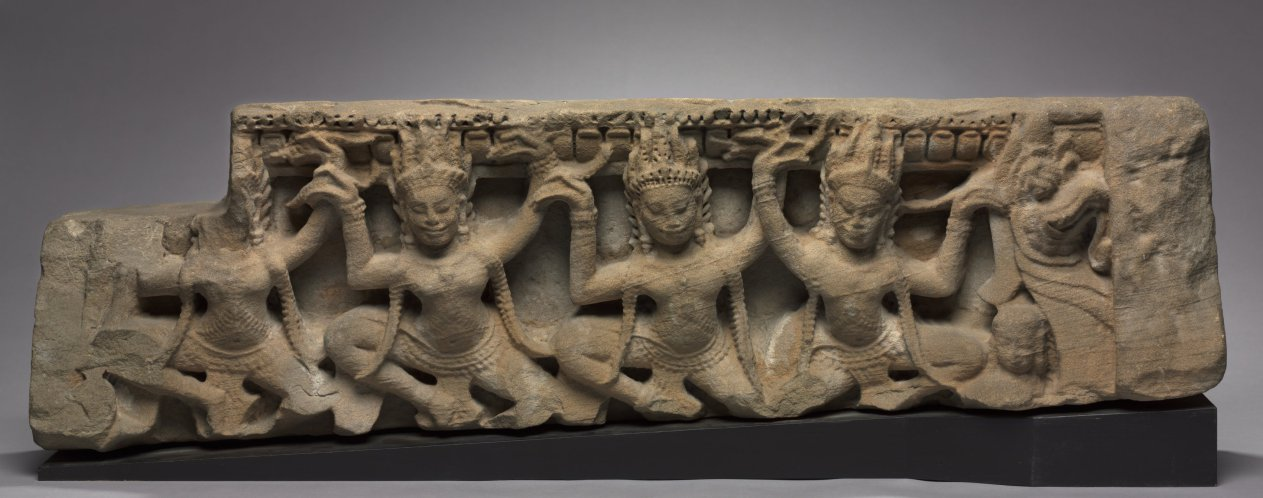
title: Frieze with Apsaras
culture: Cambodia, Angkor, the Bayon, Reign of Jayavarman VII, late 12th-early 13th Century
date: late 1100s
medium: sandstone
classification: Sculpture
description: Celestial dancers, with their legs drawn up to indicate that they are flying in space, enliven this architectural panel from the Bayon, the main state temple of the Khmer empire. The Bayon was conceived like a pantheon, housing all the divinities worshipped in the territories governed by the Khmer kingdom under King Jayavarman VII, who reigned from 1181 to 1218 across territories in present-day Cambodia and parts of Thailand and Vietnam. At various times in its history, the temple was dedicated to either the Buddha or to the Hindu god Shiva--the central icon in the sanctum was changed accordingly. Ambiguity of sectarian affiliation and the merging and changing of deities was a common occurrence in Cambodian religious practice.